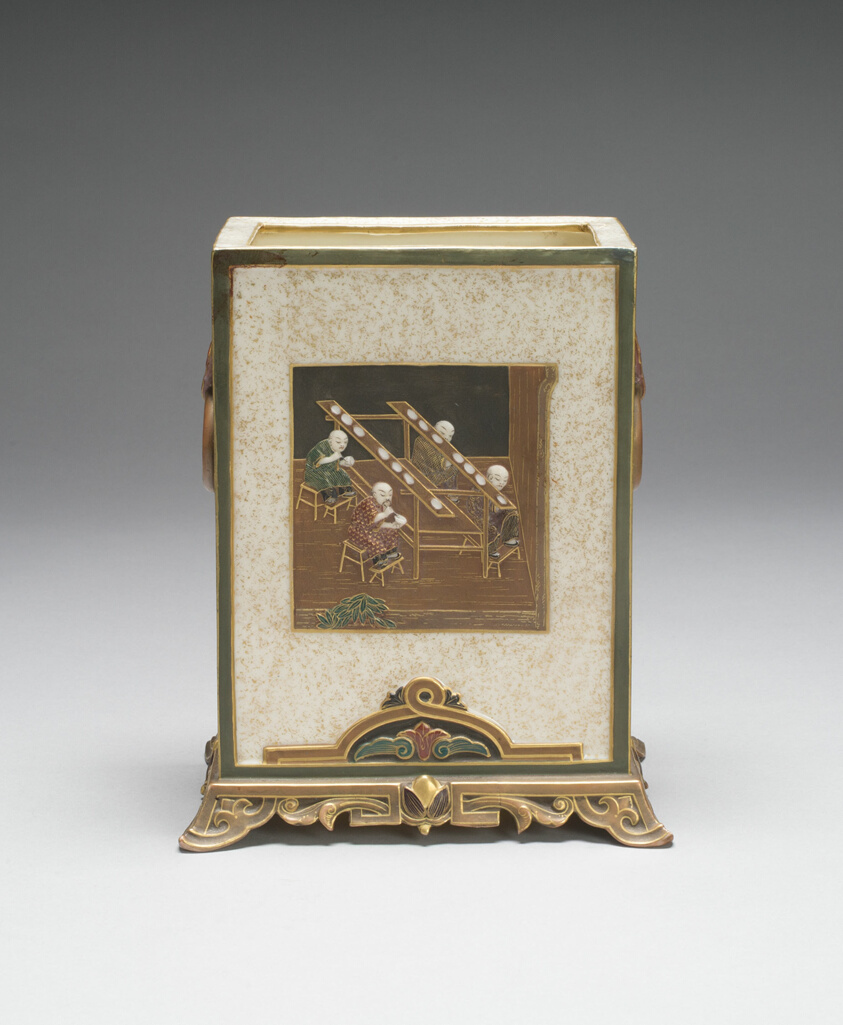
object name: Ceramics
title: Vase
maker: Worcester Porcelain Factory (Worcester Royal Porcelain Company, 1862-1958); Worcester, England, founded 1751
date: 1875/80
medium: Porcelain with polychrome enamels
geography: England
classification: vase; vessel; european decorative arts; ceramics; porcelain